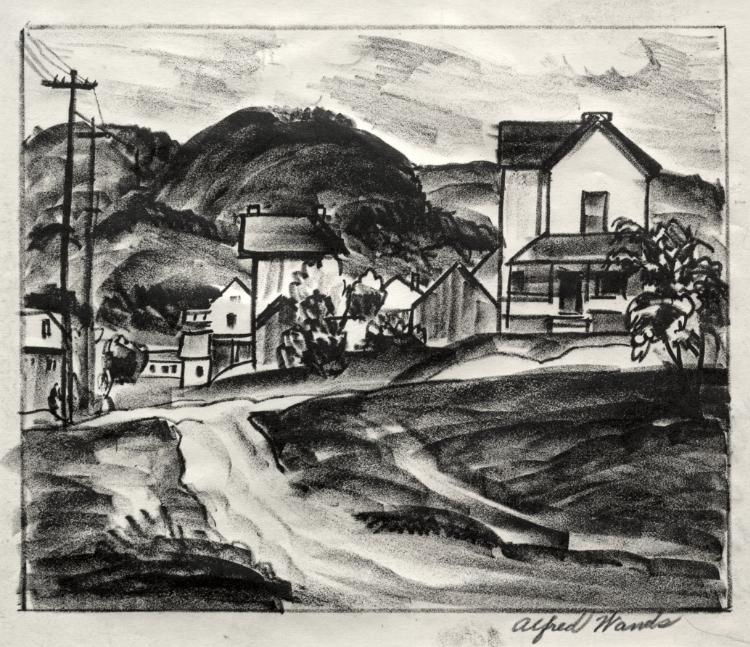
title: Rural Ohio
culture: America, Ohio, Cleveland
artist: Alfred J. Wands (American, 1904–1998)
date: 1929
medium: lithograph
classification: Print